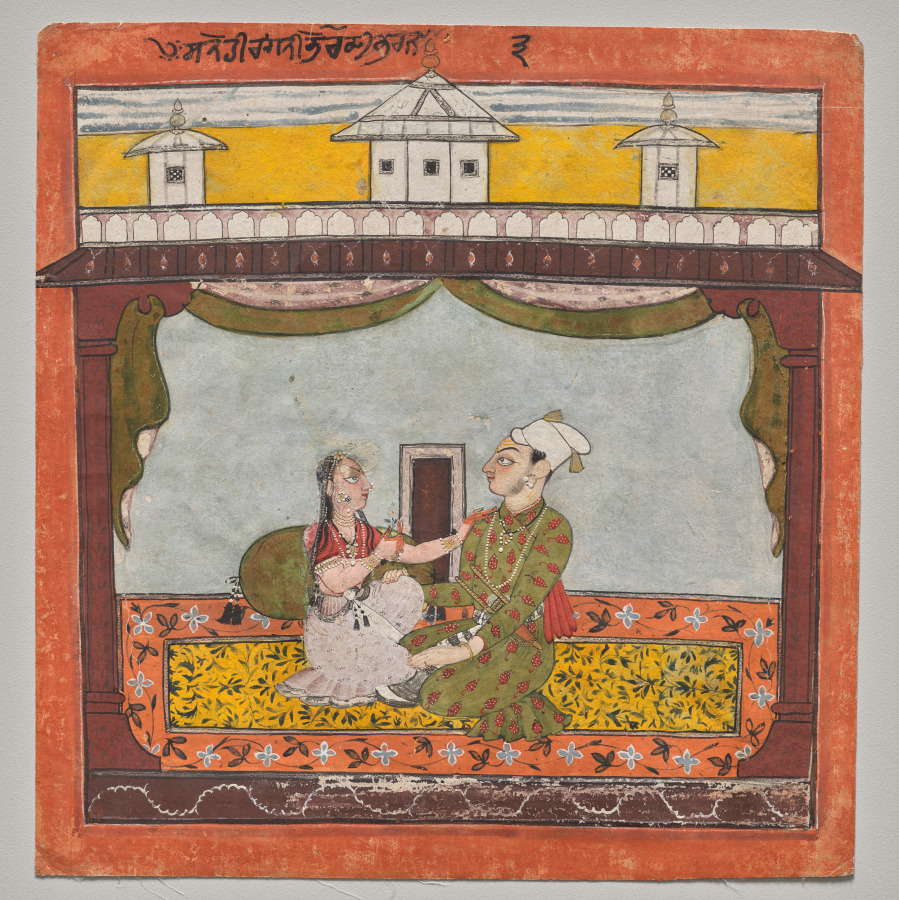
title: Sanehi Ragini, from the “Second Basohli" Ragamala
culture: Northern India, Pahari kingdoms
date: c. 1690–95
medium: gum tempera, ink, and gold on paper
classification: Painting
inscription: īsanehī rāginī bhero dī bharjā. 3.